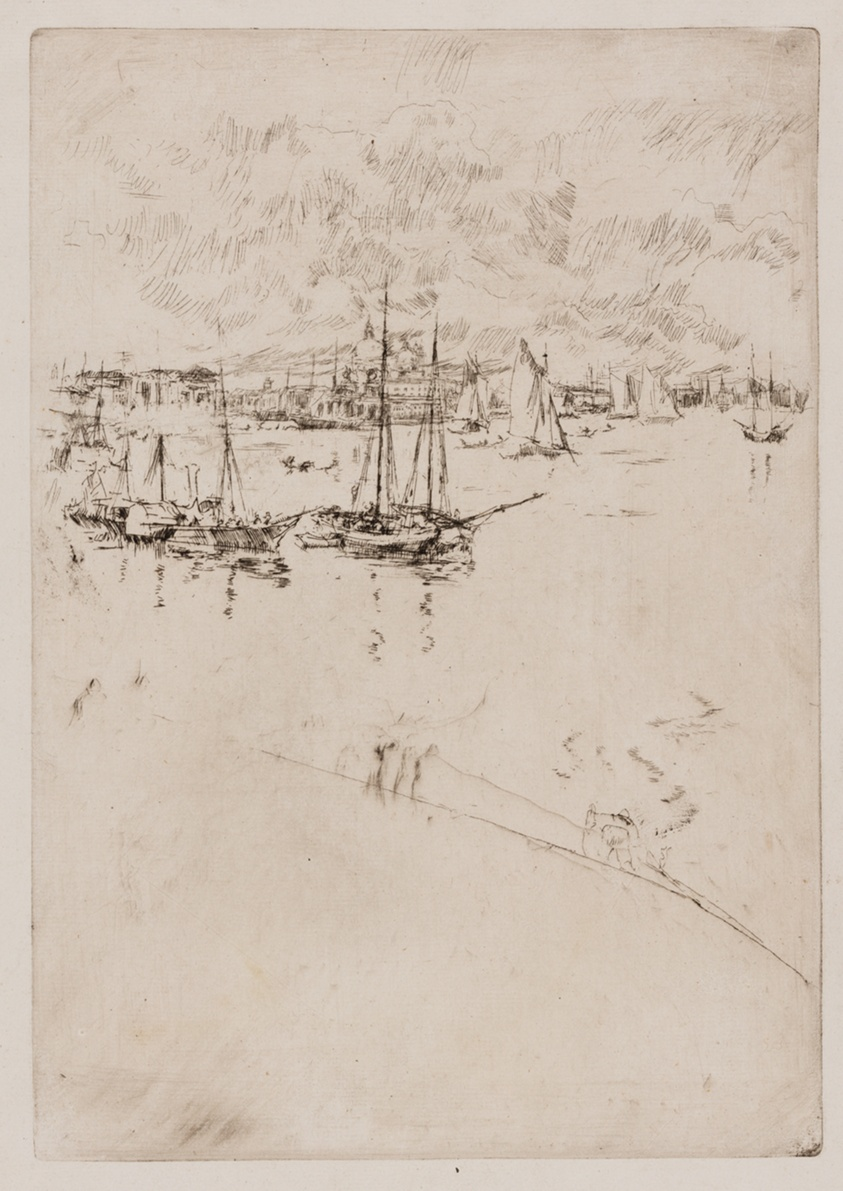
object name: Print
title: The Steamboat, Venice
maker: James McNeill Whistler (American, 1834-1903)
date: 1879/80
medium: Etching with drypoint in black ink on off-white laid paper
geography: United States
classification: etching; drypoint; print; prints and drawing; paper